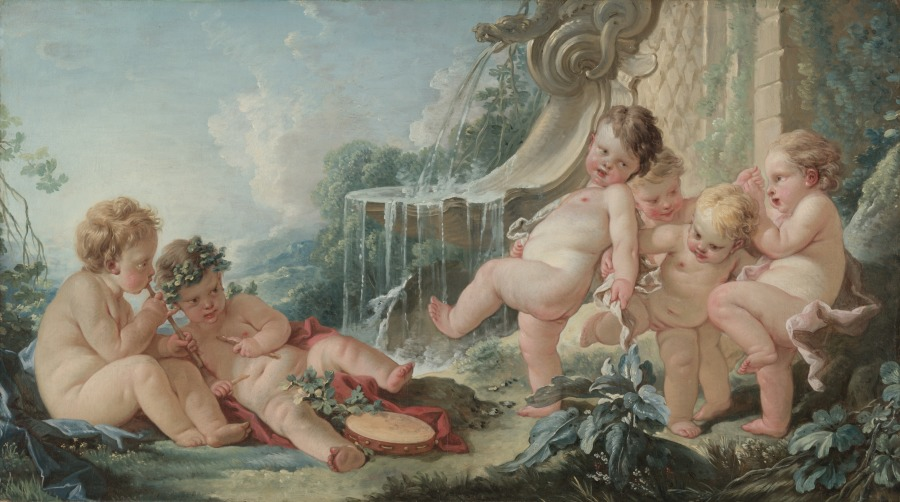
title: Music and Dance and Cupids in Conspiracy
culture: France, 18th century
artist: François Boucher (French, 1703–1770)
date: 1740s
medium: oil on canvas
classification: Painting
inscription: Signed lower left: "f Boucher"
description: Along with Cupids in Conspiracy (1948.181.2), this work is surely part of a series of over-door paintings that would have been installed in a house. However, where the panels were originally installed or who commissioned them remains unknown. They exemplify the fusion of fine arts and decorative arts that was common in elite interior design in 18th-century France. Even though the paintings were part of the wall decoration of the room, the patrons chose François Boucher, a well-known painter of portraits and genre scenes, as well as mythological and religious subjects, to execute them. These two paintings reflect a style that was popular both at court and among other wealthy patrons through much of the eighteenth century: light, charming, pastoral scenes that mix classical elements with pure fantasy. Both of them feature putti, chubby baby characters that add a touch of humor to the images.